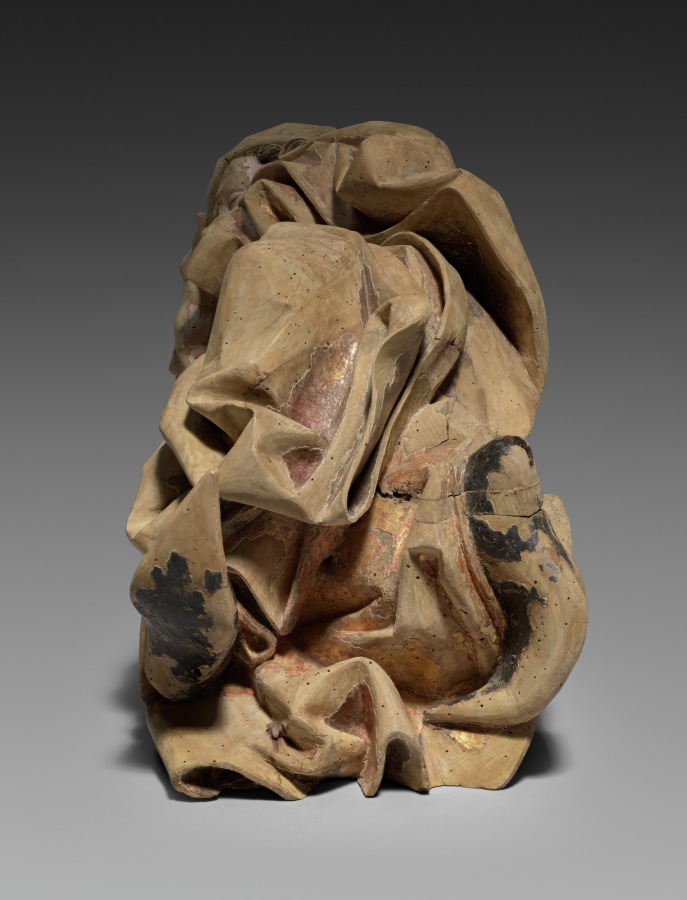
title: Jesse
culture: Germany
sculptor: Veit Stoss (German, c. 1445–1533)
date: c. 1500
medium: Limewood, polychromed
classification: Sculpture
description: The figure shows the sleeping Jesse, the father of David from the Old Testament. As the ancestor of the family tree of Christ, he was depicted in the Middle Ages sleeping as the starting point of the tree, on whose branches the ancestors of Christ are depicted. Mary with the Christ child is always shown at the top. The figure comes from a wooden altarpiece from an unknown church, possibly in Nuremberg, which is now lost. Veit Stoss is one of the most prominent German sculptors around 1500 who was mainly active in Nuremberg (Bavaria, Germany) and Krakow (Poland), also as a painter and engraver.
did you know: The family tree of Christ starts from Jesse, the father of David in the Old Testament.